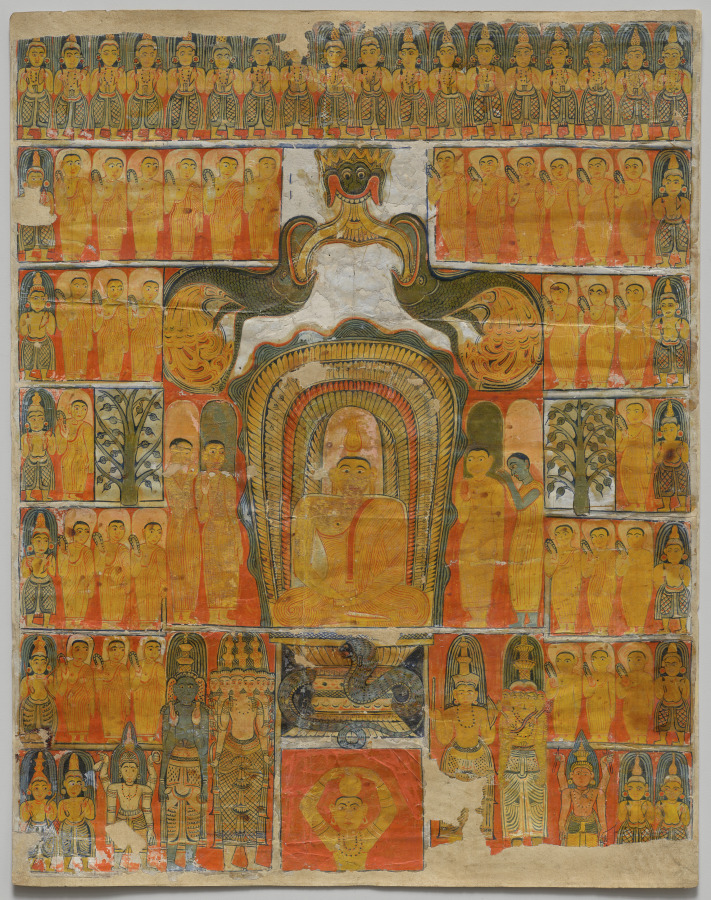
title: Blessed Lord Buddha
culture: Sri Lanka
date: c. 1825–50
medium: gum tempera on paper, varnished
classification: Painting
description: The central figure of the Buddha, radiating light and the flame of enlightenment, is flanked by his four main disciples: Sariputra and the blue Moggallana on his left, and Ananda and Anuruddha on his right. Below him is the earth goddess holding a pot of water on her head. To her right are three guardians of Sri Lanka: Kataragama (or Skanda) with six heads and twelve arms; the blue Vibhishana, younger brother of Ravana; and, smaller in size, may be Pattina holding an anklet and neem leaf. On the opposite side are three deities: Sumana, the four-faced Brahma, and four-armed Shiva with trident. Arranged around two depictions of the bodhi tree under which the Buddha reached enlightenment, rows of other monks bear garlands in veneration. Each of the standing protector divinities around the periphery grasps a bow and arrow. This painting evokes the appearance of 18th- to 19th-century murals in Sri Lankan Buddhist temple interiors, such as those at Dumbulla, with its rows of golden figures. It was probably part of a domestic shrine, along with small sculptures of the Buddha, palm-leaf manuscripts of Pali scriptures, incense, oil lamps, bells, and other offerings such as food, flowers, and water. The varnish that covers the painting may have been intended to shield it from the environment of an active place of worship.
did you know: The yellow pigment contains chromium, which was not used in pigments until 1818.